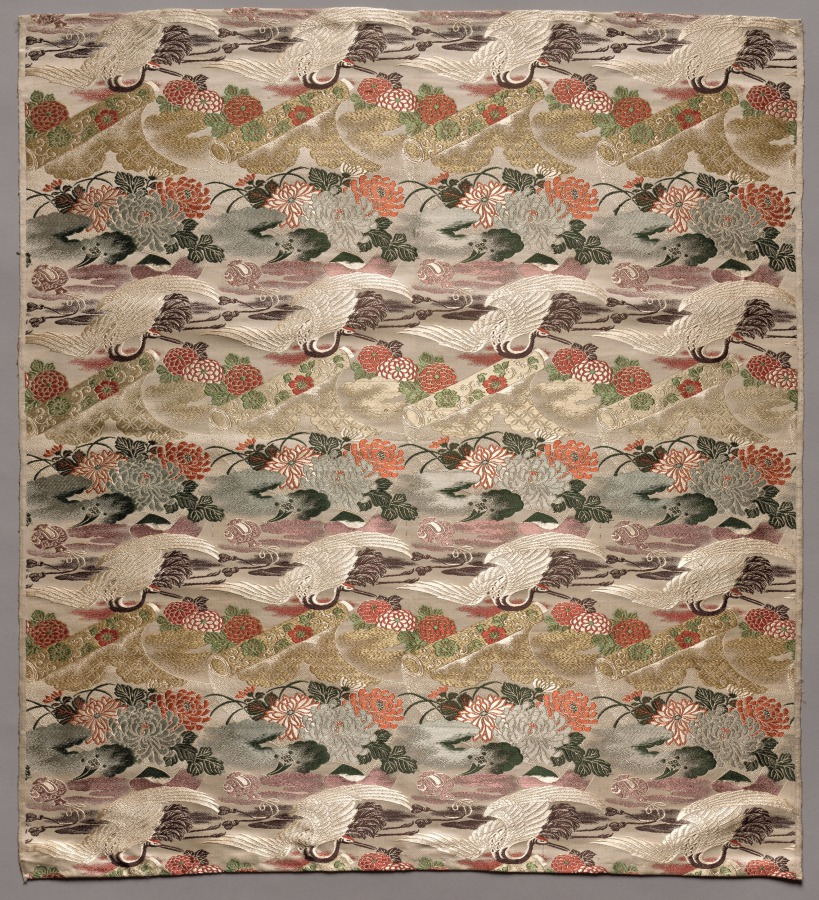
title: Length of Textile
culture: Japan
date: late 1800s-early 1900s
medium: silk, metallic thread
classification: Textile